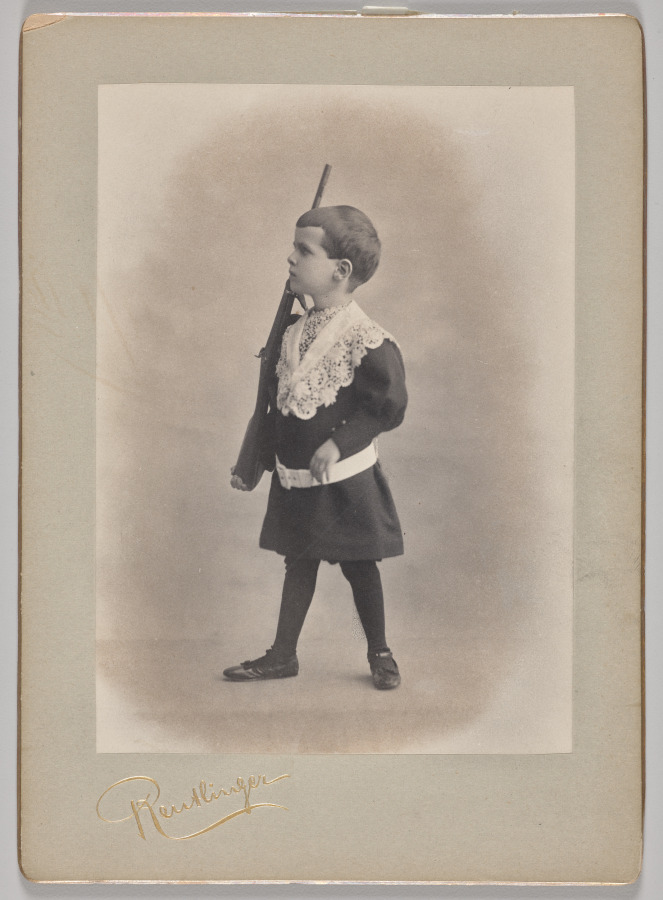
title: Untitled (young boy with lace collar and toy rifle)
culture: France, 19th century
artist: Reutlinger Studios (French, active 1850s-1937)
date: 1880s–90s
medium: gelatin silver print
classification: Photograph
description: This portrait of a boy holding a rifle suggests an association of masculinity with militarism in that era. Militaristic attitudes had a strong hold in France following the country’s defeat in the 1870–71 Franco-Prussian War. Many French people wanted revenge for Prussia’s annexation of Alsace-Lorraine, territories that did not return to French control at the end of World War I in1919. Looking at this portrait in hindsight, one might wonder if this boy served in the military or was a casualty during that war.